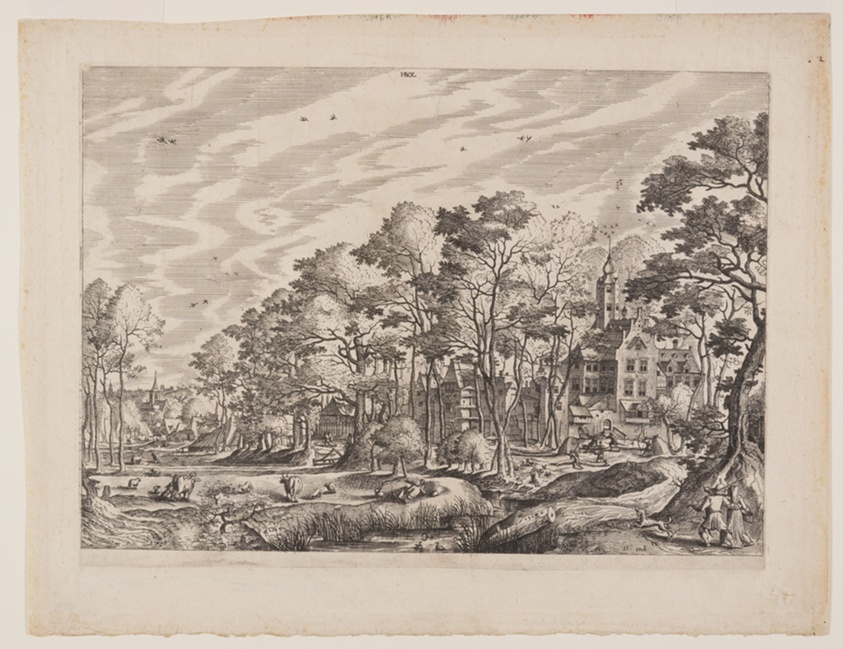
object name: Print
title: View of a Village with a Castle to the Right, plate 1 from Landscapes with Views of Villages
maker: Hans Bol (Flemish, 1534–1593)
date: 1562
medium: Etching on ivory laid paper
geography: Flanders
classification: print; paper; prints and drawing; etching